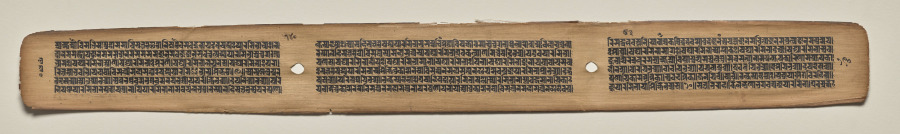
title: Text, Folio 140 (verso), from a Manuscript of the Perfection of Wisdom in Eight Thousand Lines (Ashtasahasrika Prajnaparamita-sutra)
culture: Eastern India, Bihar, Vikramashila Monastery. Painting: Nepal, Kathmandu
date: Sunday, September 14, 1119 (year 239 of the Newar Samvat in the month of Ashvina)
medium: gum tempera and ink on palm leaves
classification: Painting